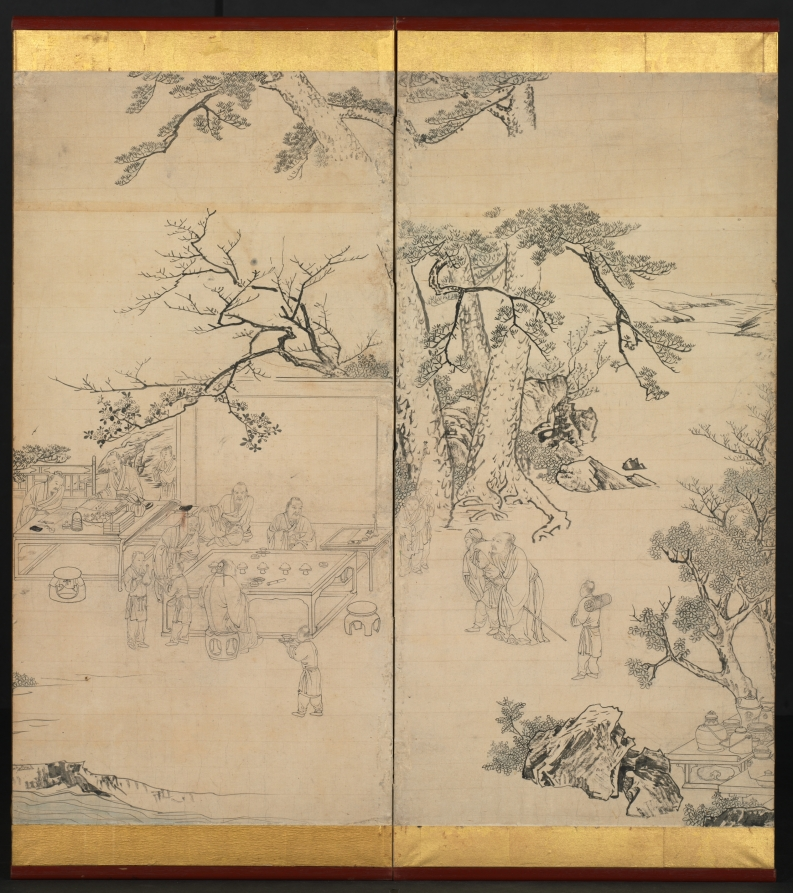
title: Literary Gathering in the Orchid Pavilion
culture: Japan, Edo period (1615–1868)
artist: Maruyama Ōkyo (Japanese, 1733–1795)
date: late 1700s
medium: Six-panel folding screen; ink and slight color on paper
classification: Painting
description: A cheerful gathering of poets was one the most popular themes of East Asian literati paintings. Literary Gathering in the Orchid Pavilion depicts a poets’ party hosted in AD 353 by the famous Chinese calligrapher Wang Xizhi to celebrate the Spring Purification Festival, observed annually on the third day of the third month. Wang invited 41 scholar-poets to compose poetry and drink while seated along the bank of a winding rivulet. This screen would have appeared on the left and shows preparations for the gathering. The lost right screen is assumed to have depicted the poets sitting along the stream.